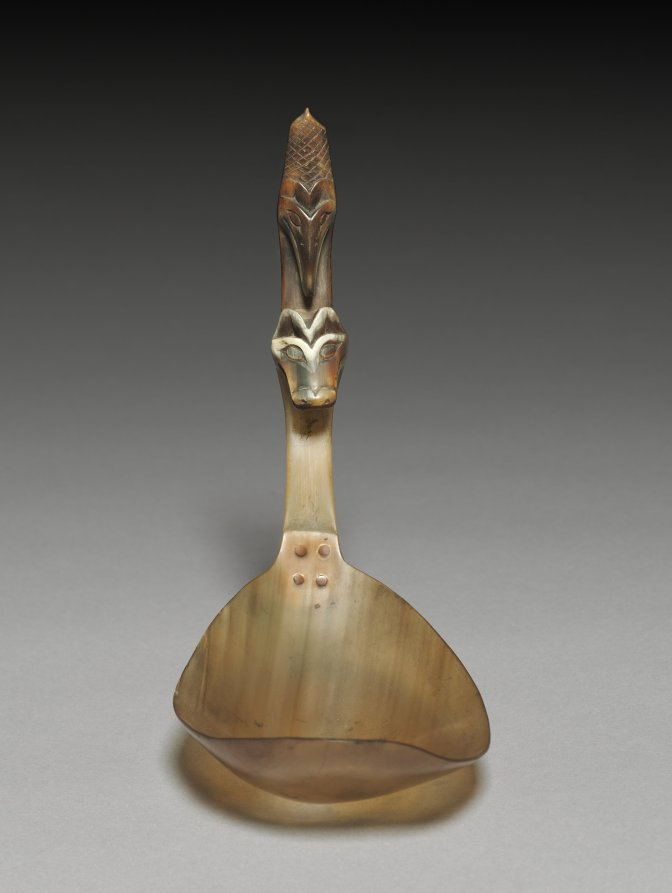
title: Spoon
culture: Native North America, Northwest Coast, Alaska, Tlingit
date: late 1800s–early 1900s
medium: horn, copper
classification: Sculpture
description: Elaborate utensils, valuable possessions of Northwest Coast noble clans, were used during potlatch feasts. This spoon’s handle features the heads of a wolf and a raven along with a beaver’s tail. All may be crests, motifs that, like European heraldry, were exclusive to important families and referred to their histories and rights to control land and resources.